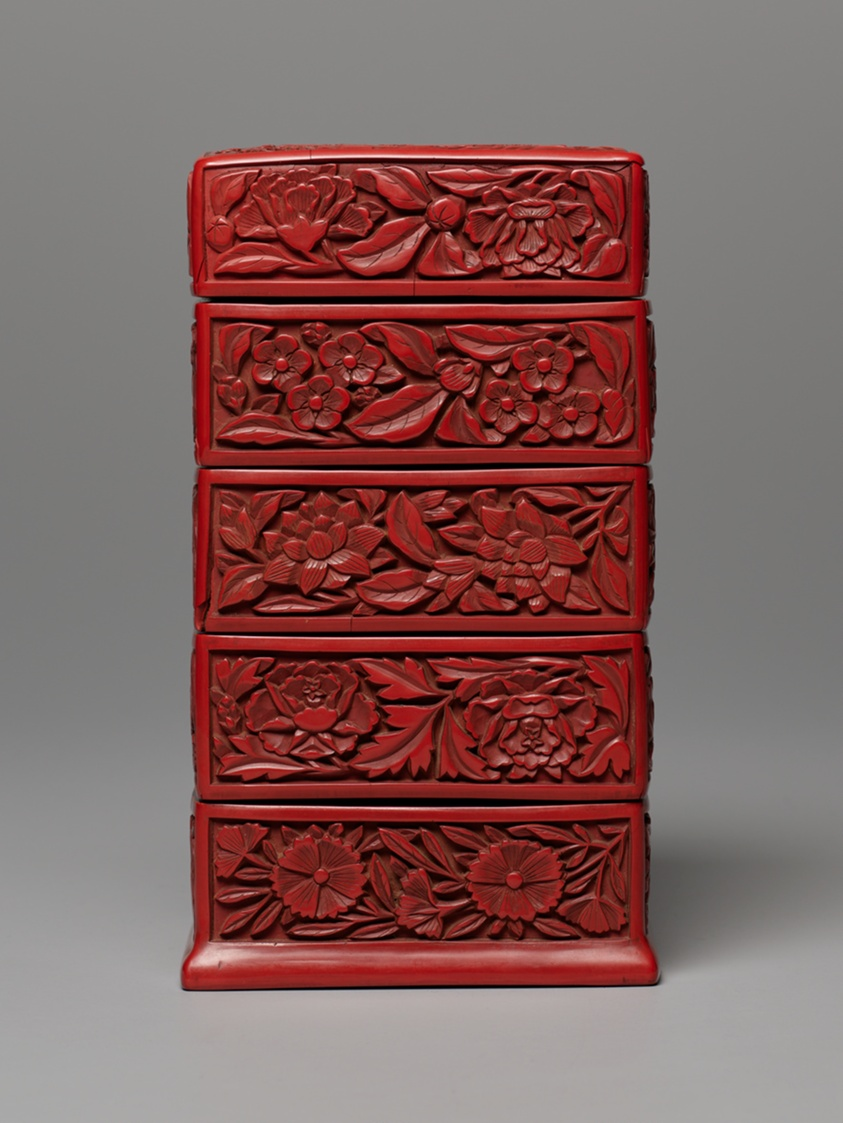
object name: Decorative Arts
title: Four-Tiered Square Box and Cover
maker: China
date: Ming dynasty (1368-1644), 16th century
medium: Carved cinnabar lacquer and black lacquer (interior)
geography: China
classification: lacquer